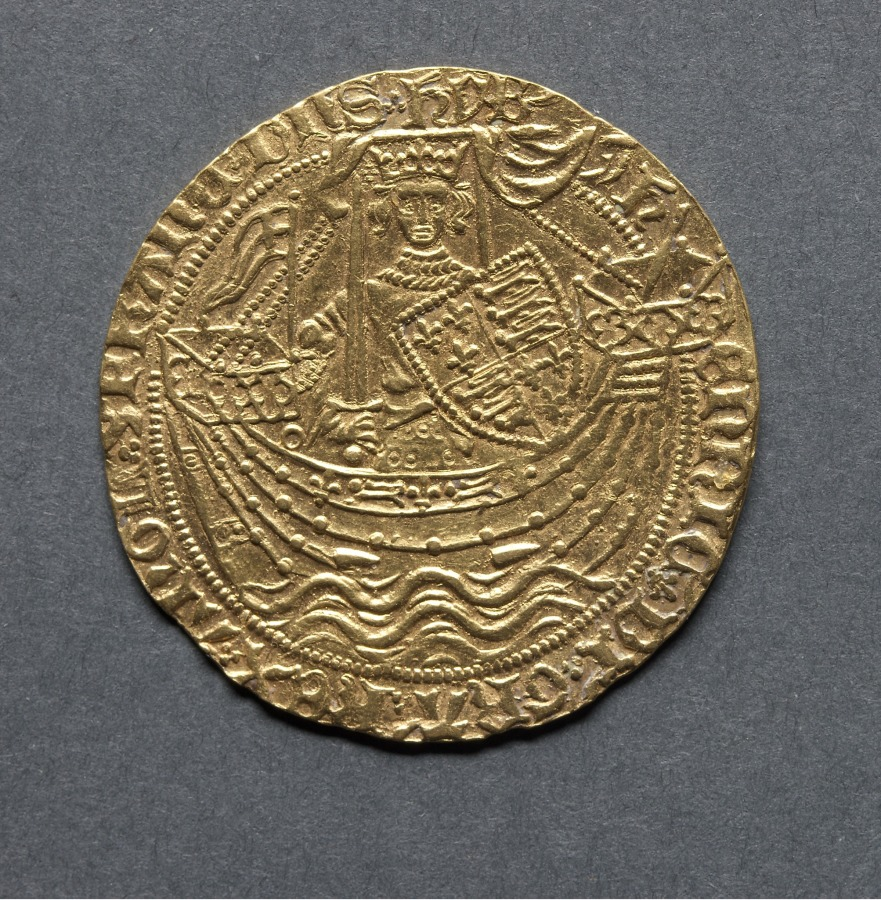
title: Noble: Henry VI in Ship with Shield of Arms (obverse); Ornamental Cross with Lis Terminals (reverse)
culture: England, Henry VI, 1422-1461 (restored 1470-1471)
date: 1422–61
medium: gold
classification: Coins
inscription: HENRIC DI GRA REX ANGL Z FRANC DNS HYB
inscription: IHC AUT TRANSIENS PER MEDIUM ILLORR IBAT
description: The Nobles of Henry VI were very much like those of the previous reign. The system of varying the stops, as annulets, pinecones, mascles, and so forth was introduced to help simplify the changes of privy marks, over 150 which helped identify the coin and where it was minted, which were required for the king's long reign.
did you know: Although struck throughout the reign of Henry VI, a shortage of gold meant fewer coins were being struck.